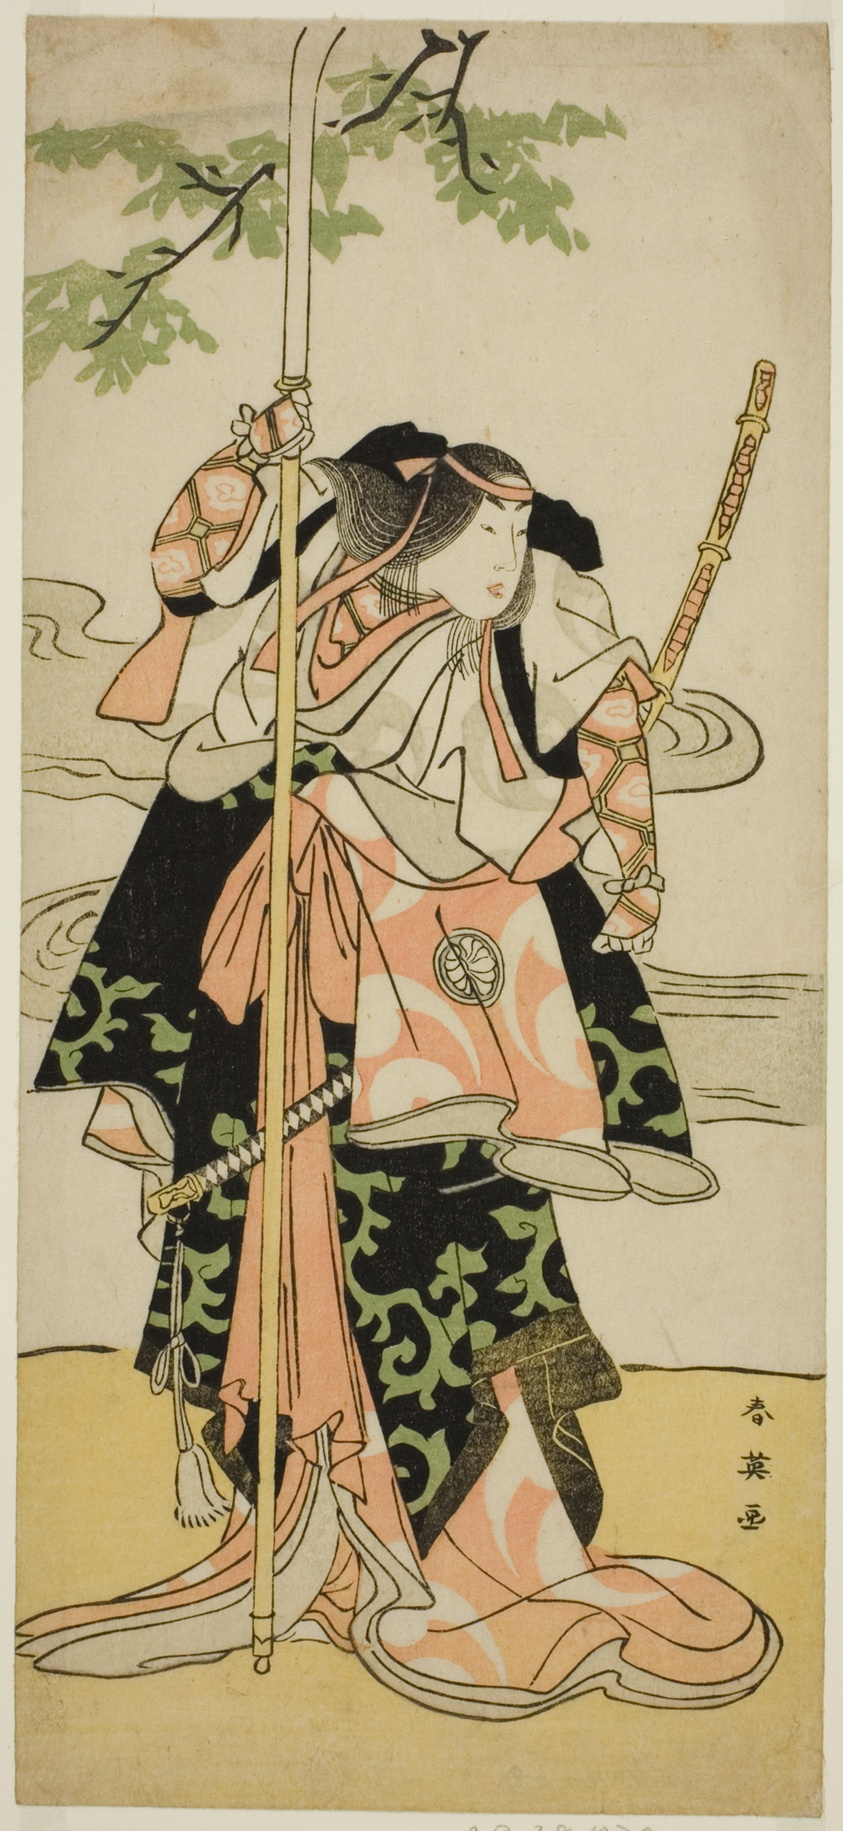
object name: Print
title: The Actor Segawa Kikunojo III as Lady Tomoe (Tomoe Gozen) in the Play Yasa Gumbai Miyako no Jindori, Performed at the Miyako Theater in the Eleventh Month, 1793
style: Japanese (culture or style)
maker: Katsukawa Shun'ei (Japanese, 1762-1819)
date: c. 1793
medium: Color woodblock print; hosoban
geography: Japan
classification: print; asian art